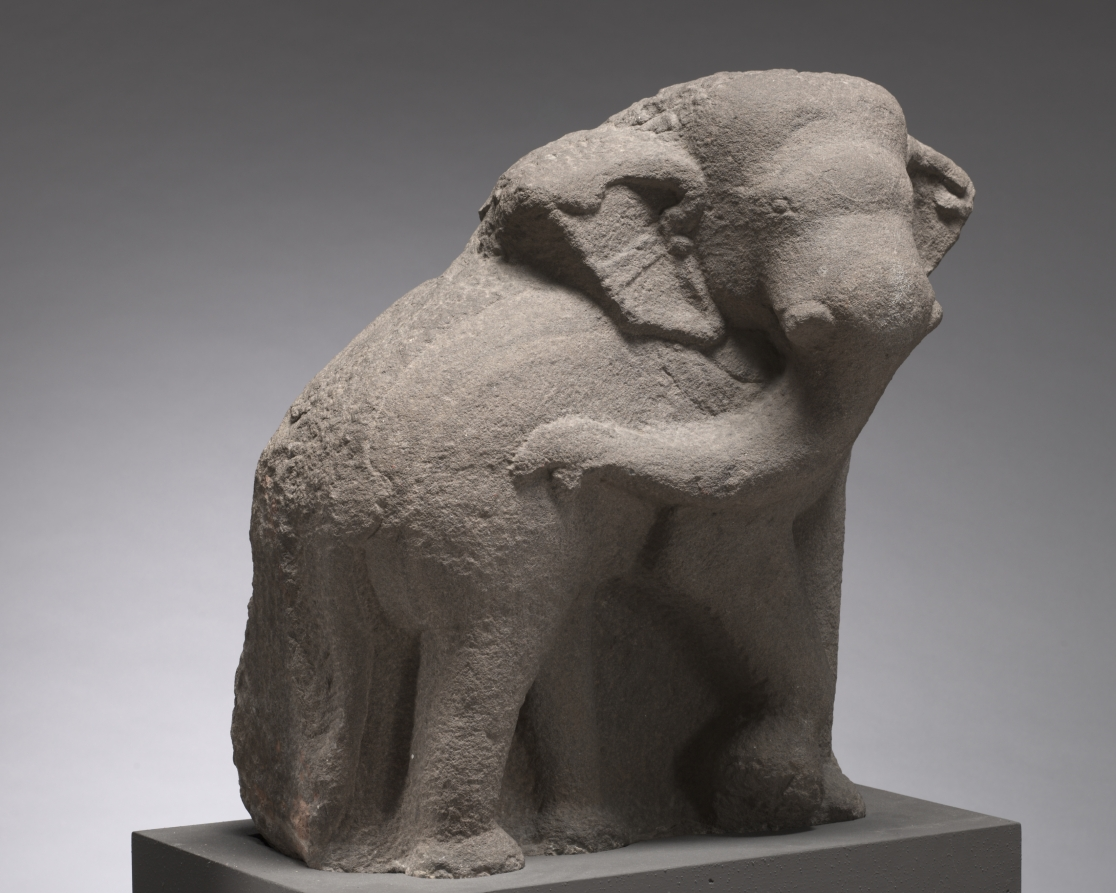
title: Elephant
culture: Vietnam, Tra-Kieu, 1st half of 10th Century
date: 900–950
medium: sandstone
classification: Sculpture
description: The Cham kingdom was located in present-day central Vietnam and was a powerful rival of the Khmer in Cambodia. During the time when this charming, naturalistic elephant sculpture was made, the Cham were actively absorbing stylistic elements from India.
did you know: The elephant's features are worn and softened due to weathering.